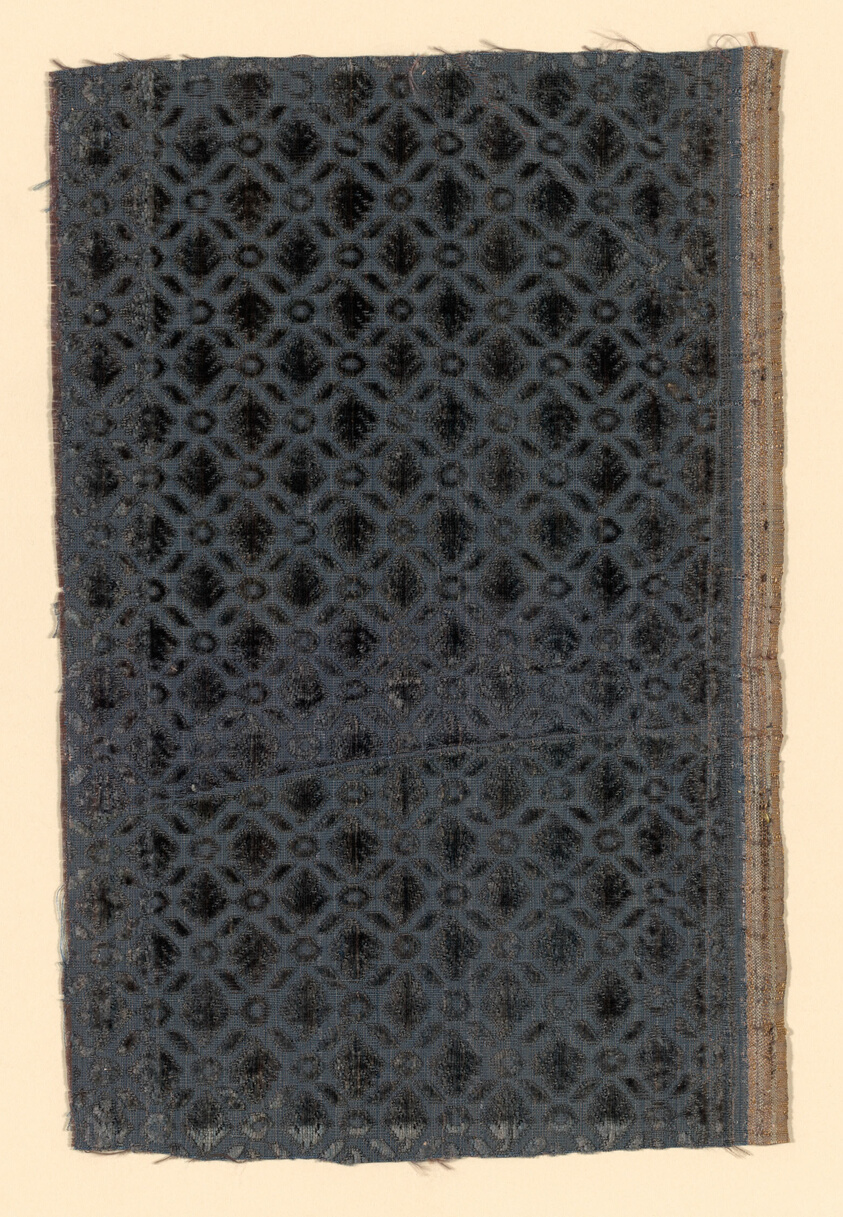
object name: Textile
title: Fragment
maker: Italy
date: 1601/50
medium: Silk, cut, uncut, and voided velvet against plain weave foundation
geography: Italy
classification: textile; weaving - velvet; weaving